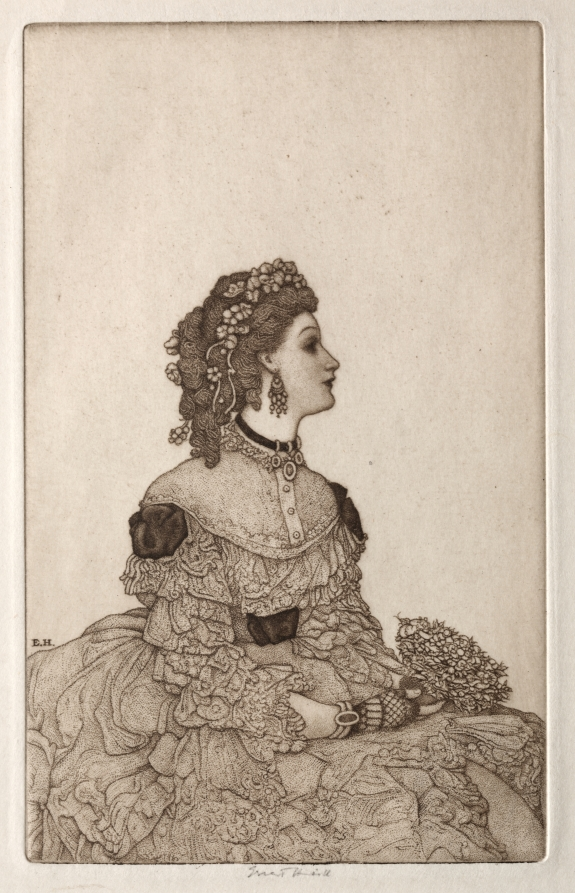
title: Amelia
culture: America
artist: Ernest Haskell (American, 1876–1925)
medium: stipple engraving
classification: Print